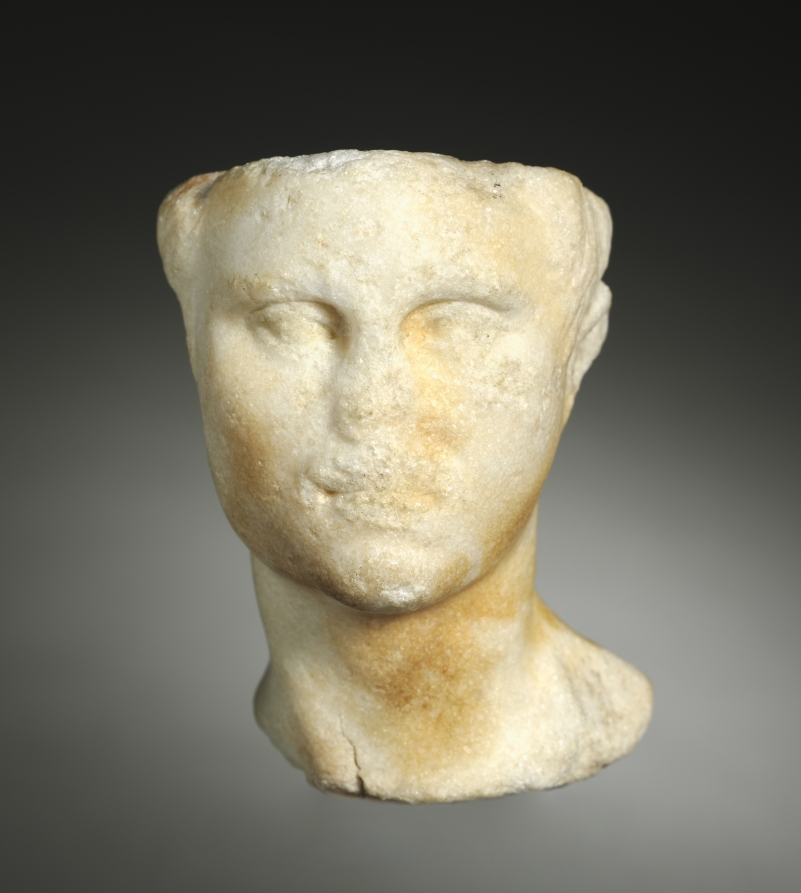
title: Fragment: Head of a Man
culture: Greco-Roman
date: 100 BCE–100 CE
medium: marble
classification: Sculpture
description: This small marble portrait of a man is heavily damaged, with weathering on the face, a break at the neck, and a large portion of the top of the head missing. It depicts a beardless youth with close-cropped hair. The flat top and back of the head may indicate that it was part of a larger composition.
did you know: Some marbles are softer than others and more vulnerable to wear.